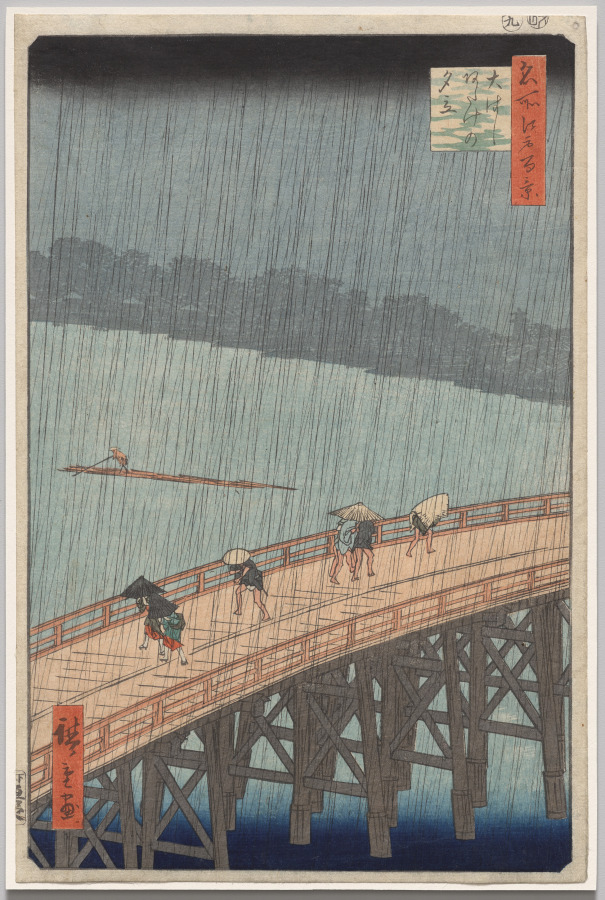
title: Sudden Shower over Shin-Ōhashi Bridge and Atake, from One Hundred Famous Views of Edo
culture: Japan, Edo period (1615–1868)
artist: Utagawa Hiroshige (Japanese, 1797–1858)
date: 1857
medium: color woodblock print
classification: Print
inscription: Signature: Hiroshige ga Publisher: Uoya Eikichi (Uoei, Shitaya) Censorship Seal: aratame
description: Published two years after the great earthquake and fire of 1855, this print design illustrates the newly rebuilt Great Bridge over the Sumida River in Edo (now Tokyo). The design shows Utagawa Hiroshige’s skill in capturing atmospheric conditions. People try to protect themselves from sudden sheets of rain as they cross the bridge in opposite directions. The Atake neighborhood is seen in the distance.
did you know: The Ohashi Bridge was one of 300 bridges that crossed the Sumida River.